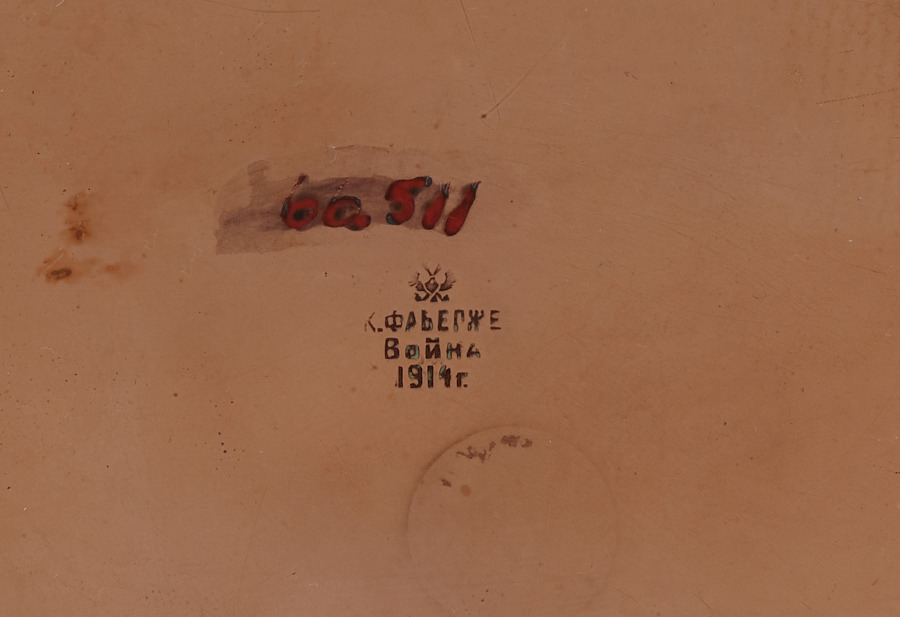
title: Pot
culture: Russia, St. Petersburg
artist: firm of Peter Carl Fabergé (Russian, 1846–1920)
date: 1914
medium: copper with brass handles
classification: Metalwork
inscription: inscribed: War (in Cyrillic), 1914r.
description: As Russia entered the First World War, austerity and economy settled into the fabric of life even among wealthy aristocrats and nobility. Not only were precious materials such as gold, silver, and gemstones hard to procure, but such luxury seemed out of place when so many men were dying at the front. Fabergé contributed to the war effort by making shells, casings, and other munitions out of brass and copper. He also made cookware, such as this small soup pot, to be sent to the front lines with provisions tucked inside. However, these simple forms only looked affordable. They were still a luxury only the wealthiest families could afford to send to their sons.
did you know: This copper soup pot was sent to the front lines filled with provisions during the First World War.